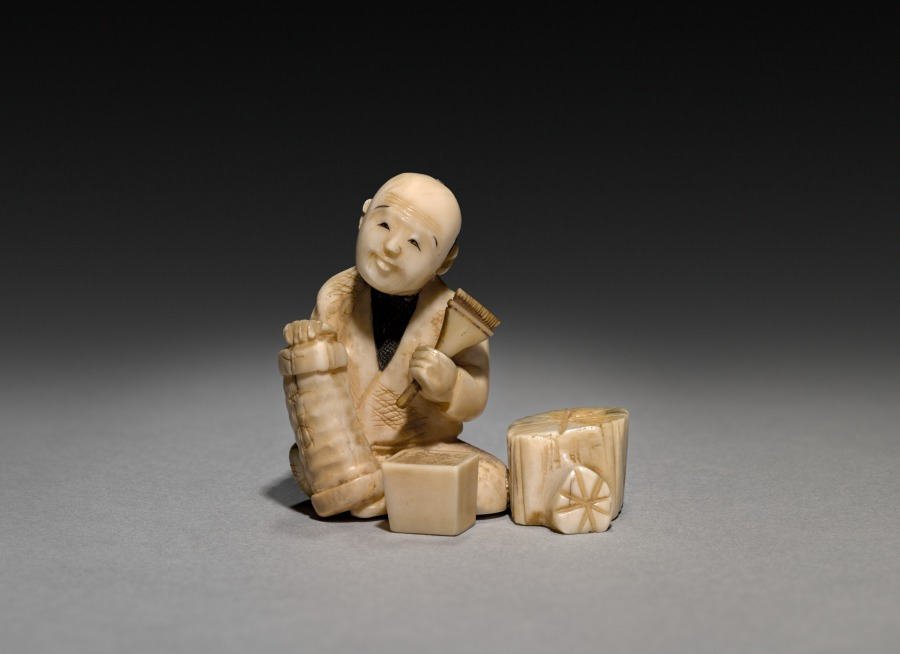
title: Man with Brush and Lantern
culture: Japan, Meiji period (1868–1912)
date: early 1900s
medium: ivory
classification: Ivory